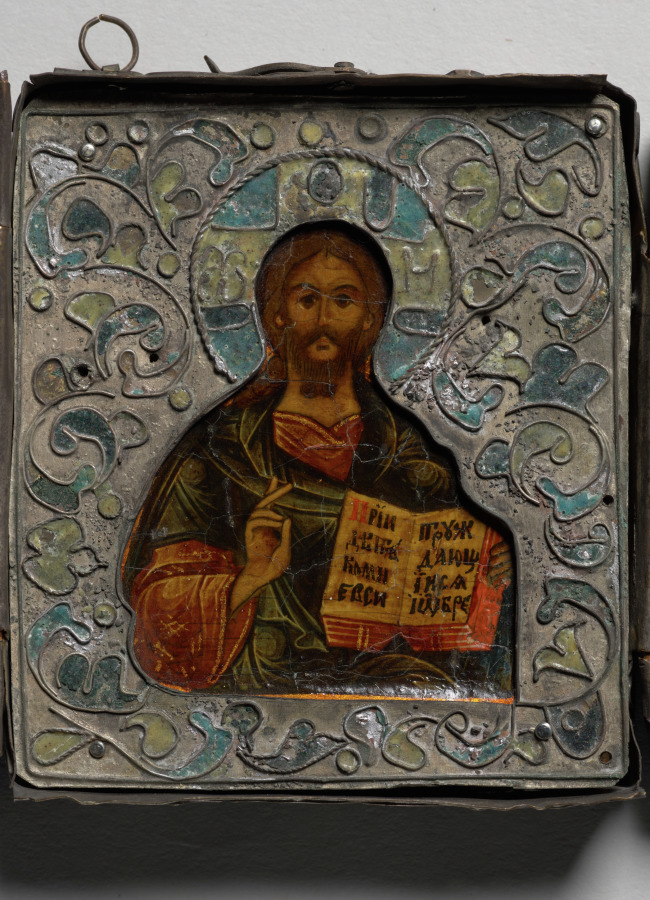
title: Christ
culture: Russia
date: 1800s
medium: pigment on wood, in cloisonné enamelled insert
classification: Painting